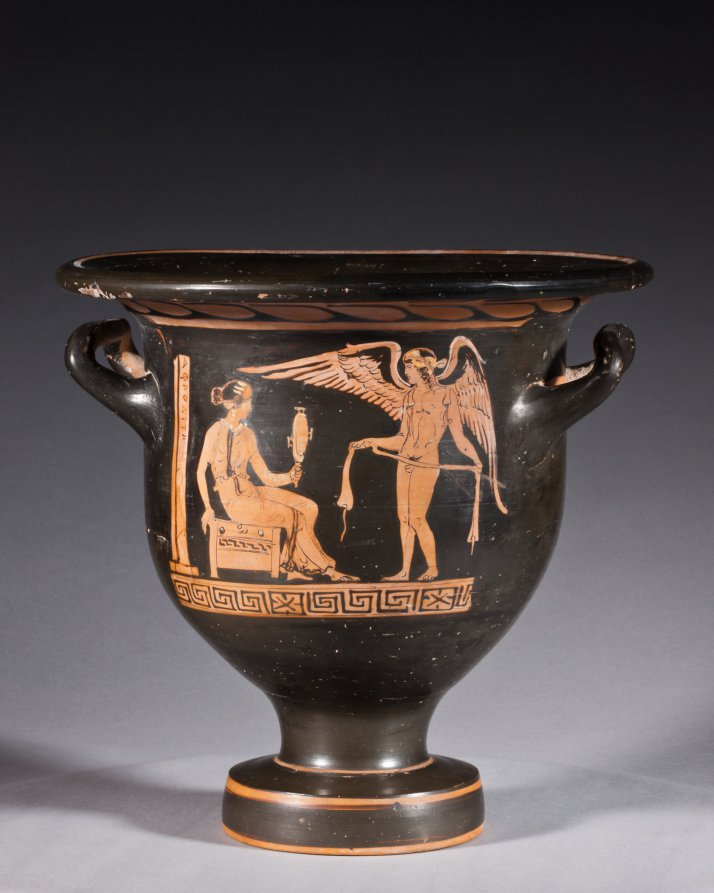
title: Red-Figure Bell Krater (Mixing Vessel): Aphrodite and Eros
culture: South Italian, Apulian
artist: attributed to Graz Painter (South Italian, Apulian, active c. 380–360 BCE)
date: c. 370–360 BCE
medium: ceramic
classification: Ceramic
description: This small mixing vessel shows a finely dressed woman seated on a chest and holding up a mirror to admire herself. Before her stands Eros, the winged god of love, holding a ribbon or sash. Behind the woman stands a pillar with the inscription ΑΦΡΟΔΙΤΗ, or APHRODITE, the goddess of love. Such labels are rare on vases, and scholars debate whether this names the woman shown as Aphrodite herself, with her son Eros, or a bride envisioning herself as Aphrodite, just before her wedding.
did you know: The dancing nude youths on the reverse are unusual; typically they would be standing and draped.